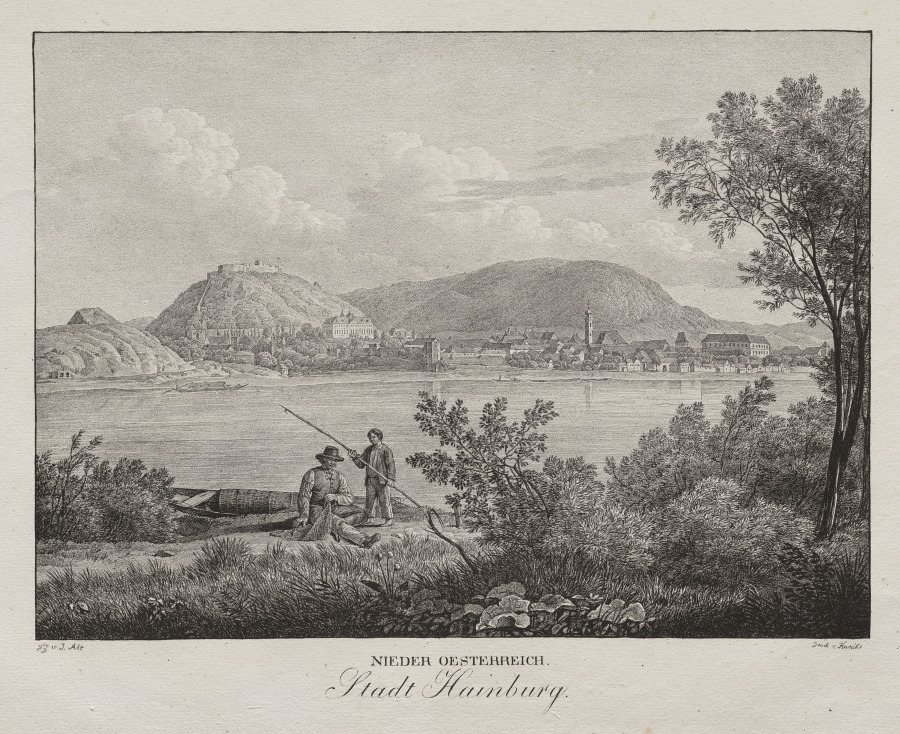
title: Nieder-oesterreich, Stadt Hainburg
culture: Austria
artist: Jakob Alt (Austrian, 1789–1872)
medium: lithograph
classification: Print